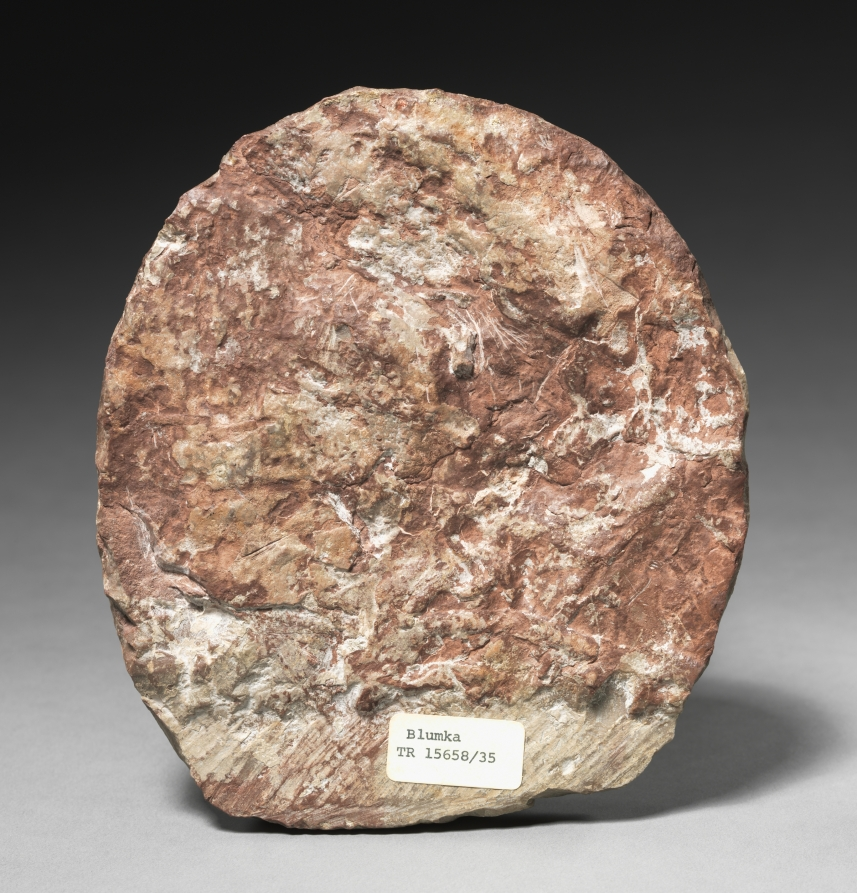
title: Hercules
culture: Italy, 16th century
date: 16th Century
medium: marble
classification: Sculpture